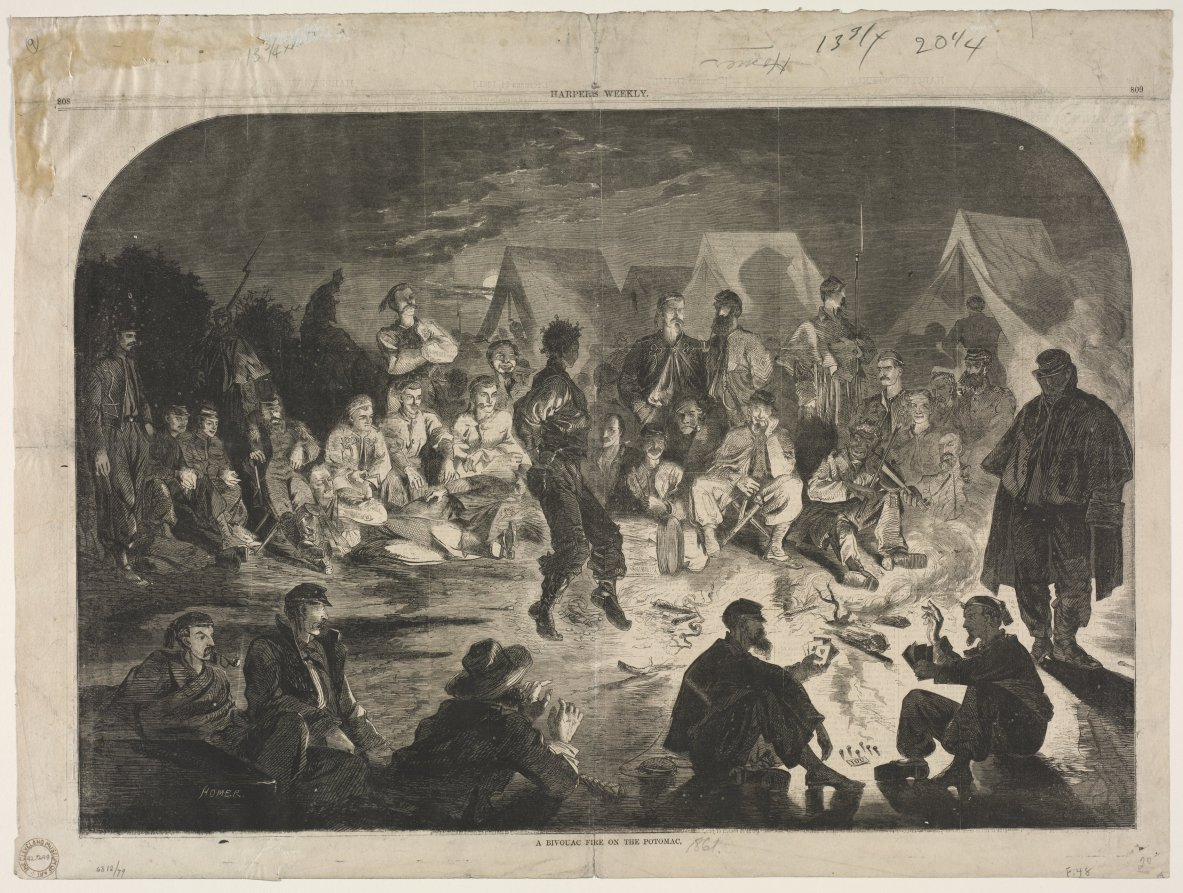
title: A Bivouac Fine on the Potomac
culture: America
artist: Winslow Homer (American, 1836–1910)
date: 1861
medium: wood engraving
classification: Print